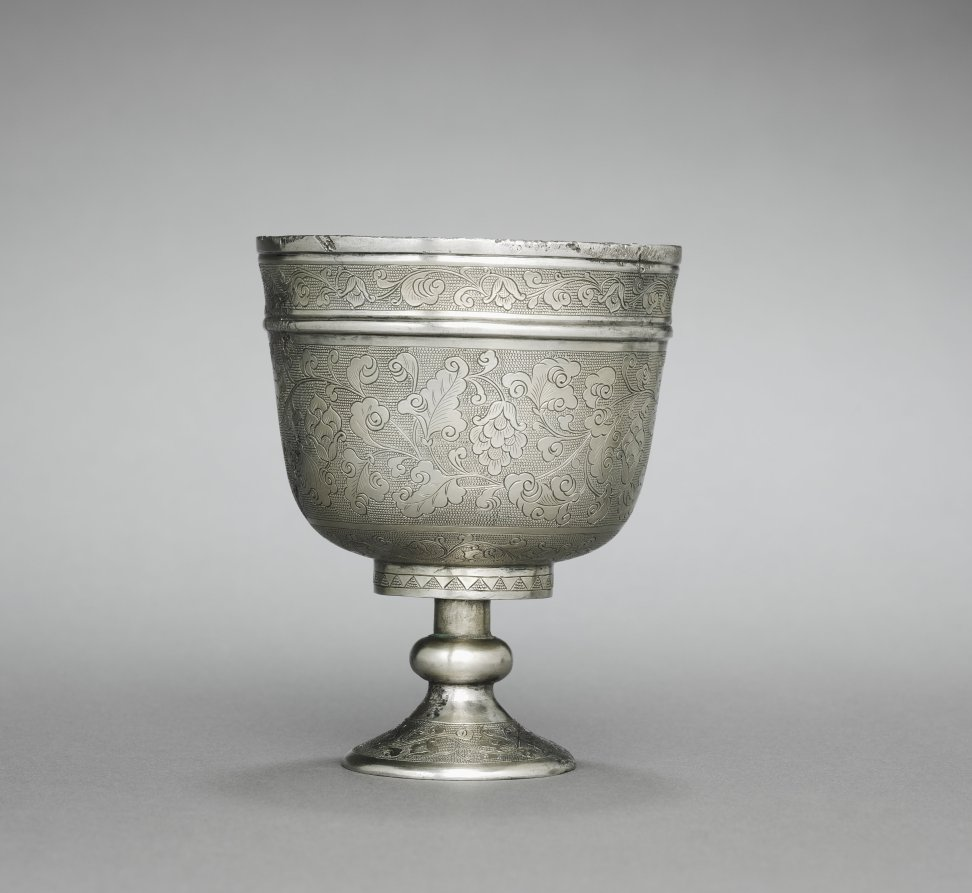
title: Stem Cup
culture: China, Tang dynasty (618-907)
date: early 700s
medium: silver with gilt interior and incised and chased decoration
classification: Silver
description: This stem cup is a supreme example of secular silver. During the Tang Dynasty (618–907), vessels like this were used to serve both tea and wine, the beverages enjoyed by the elite. It also demonstrates the effects of east-west exchanges along the Silk Road: the stem cup was a popular shape in Sasanian Iran.